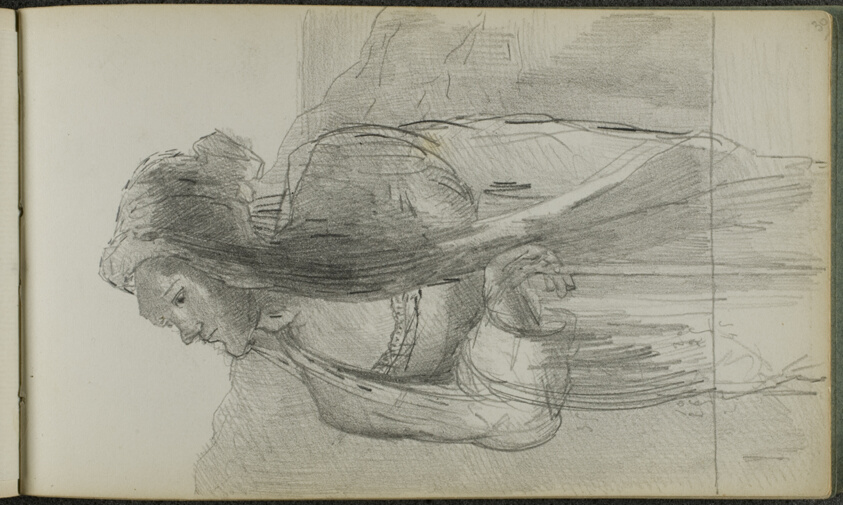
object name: Book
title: Sketchbook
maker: Odilon Redon (French, 1840-1916)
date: c. 1879–85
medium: 55-page sketch book of drawings in pencil on cream wove (with a few buff and blue) paper, with (simulated) laid paper interleaves, bound in black cardboard with black fabric taping on spine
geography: France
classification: sketchbook; graphite; prints and drawing; book; paper